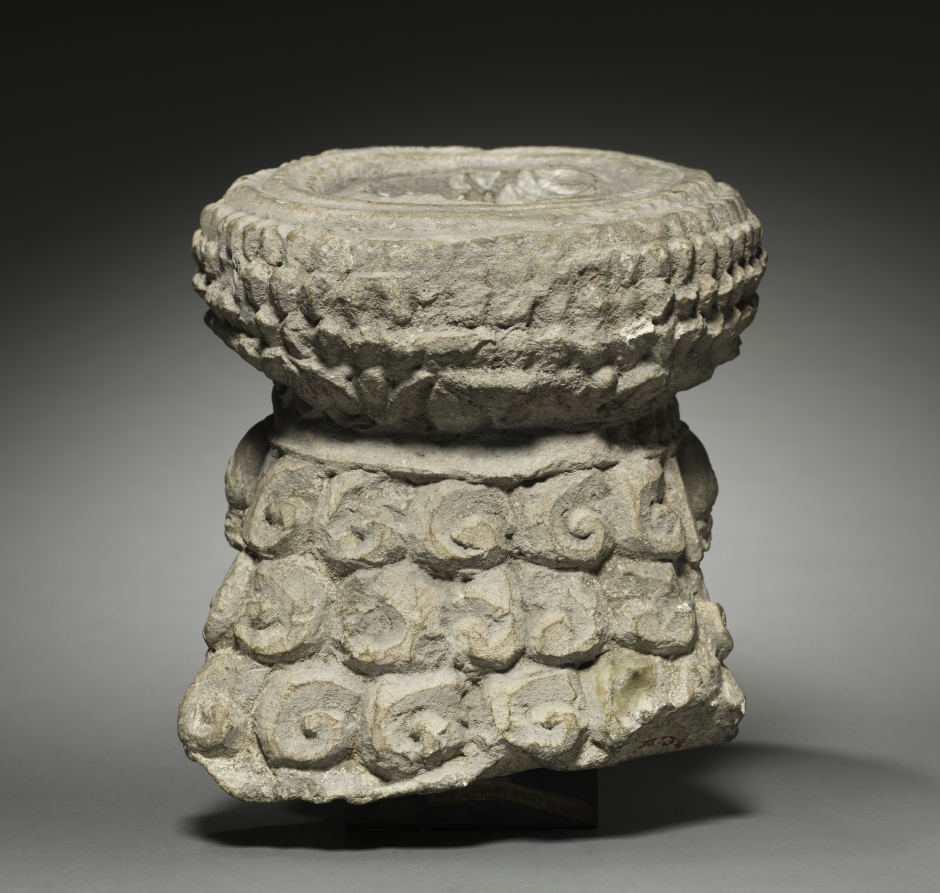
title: Head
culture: Cyprus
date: 500–300 BCE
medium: limestone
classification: Sculpture